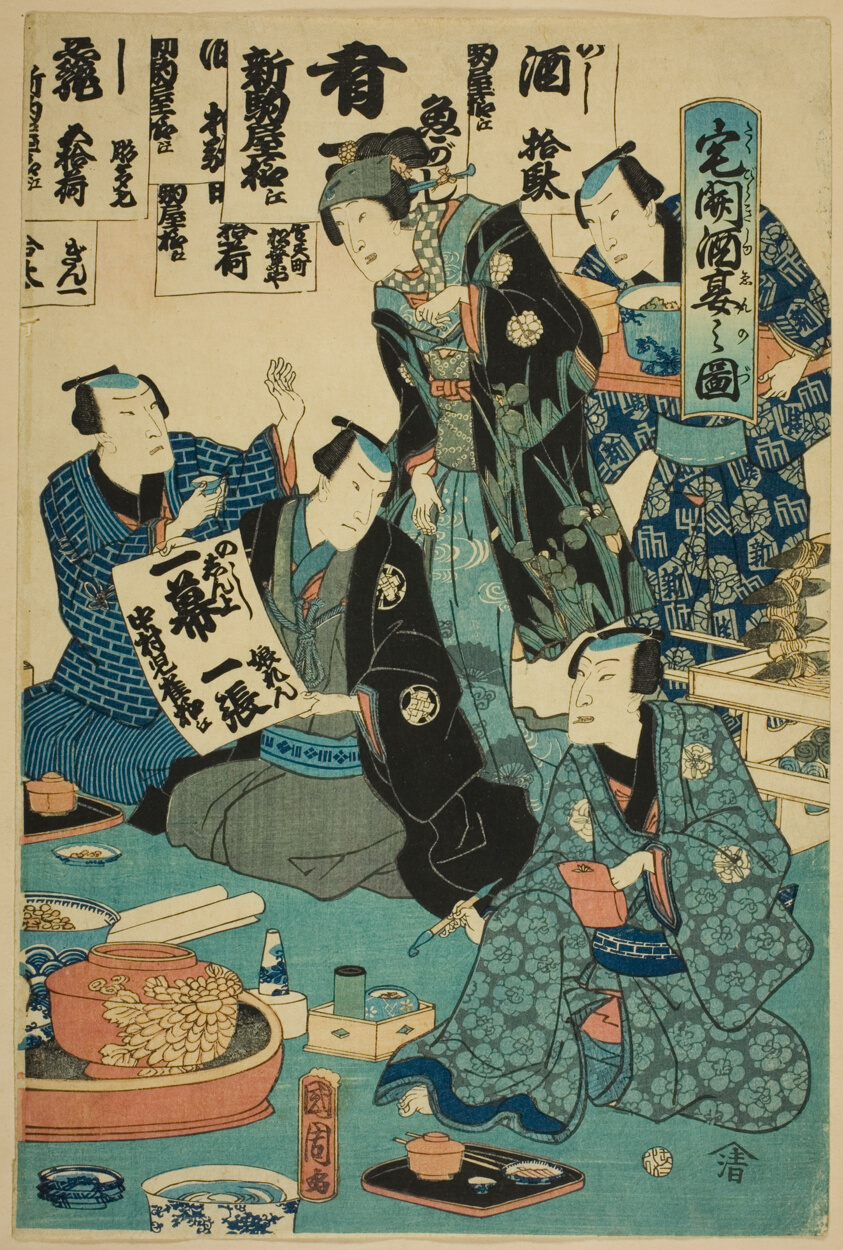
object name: Print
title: Drinking Sake at a Housewarming Party (Takubiraki shuen no zu)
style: Japanese (culture or style), edo (japanese period), Japanism, East Asian, asian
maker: Toyohara Kunichika (Japanese, 1835-1900)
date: 1863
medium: Color woodblock print; right sheet of oban diptych or triptych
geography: Japan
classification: woodblock print; print; asian art